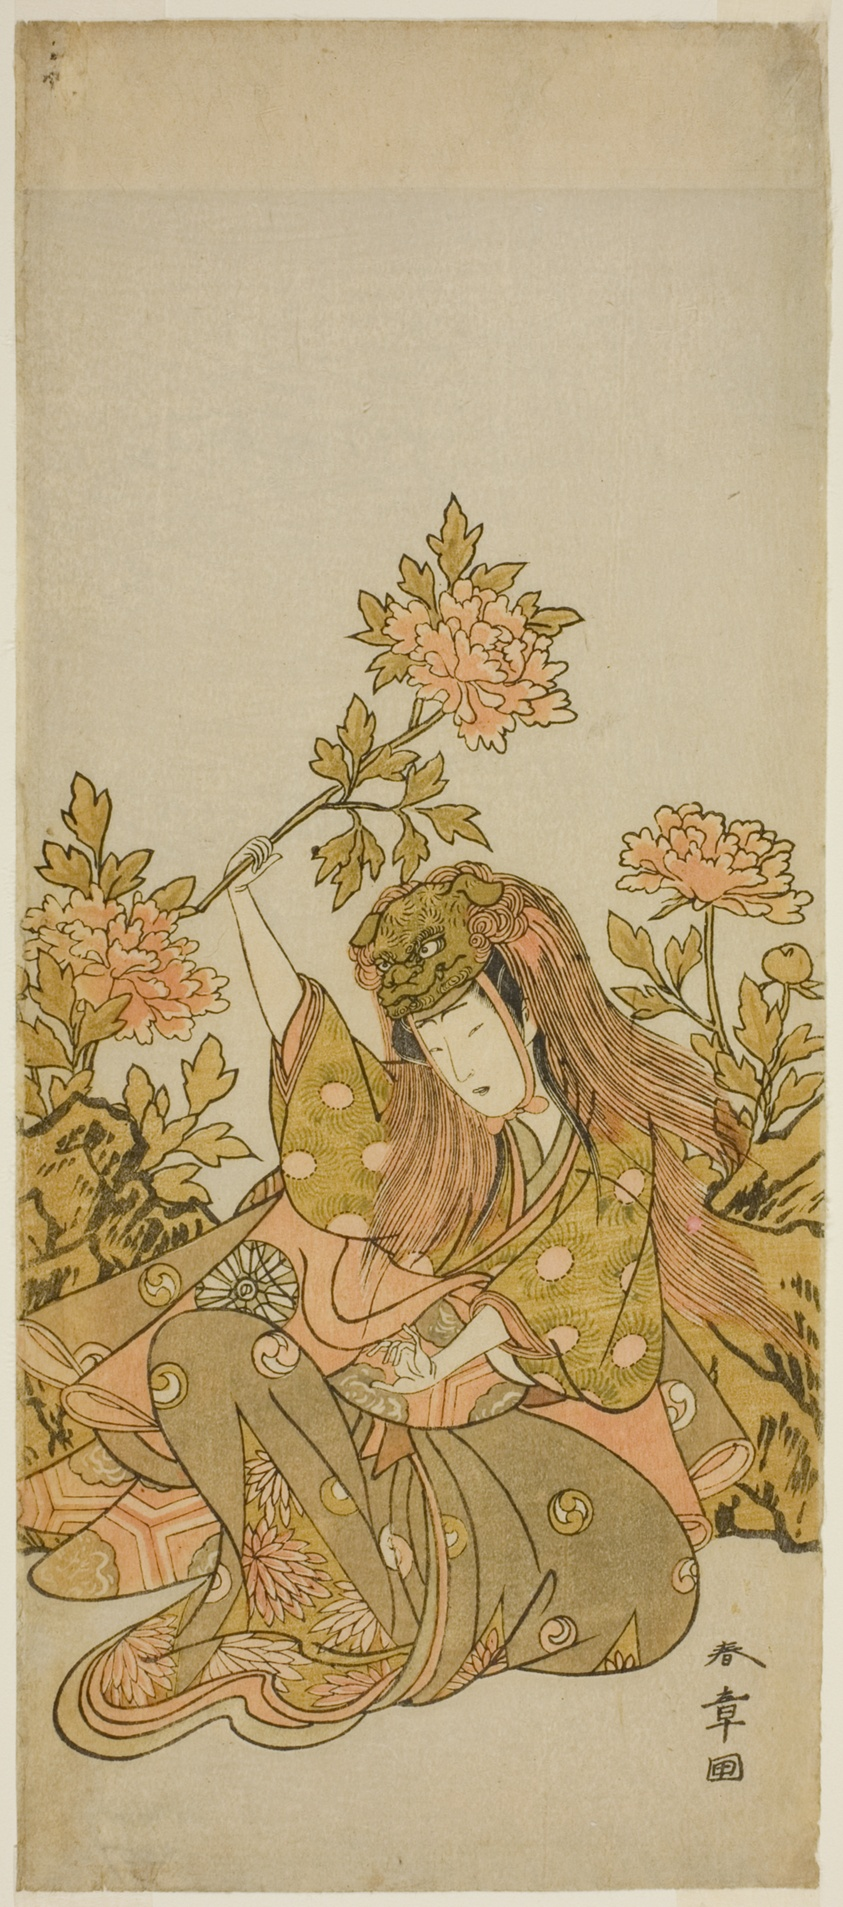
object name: Print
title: The Actor Nakamura Noshio I in a "Shak-kyo Odori" (Stone Bridge Dance), in the Play Onna Aruji Hatsuyuki no Sekai, Performed at the Morita Theater in the Eleventh Month, 1773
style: Japanese (culture or style)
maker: Katsukawa Shunsho 勝川 春章; Japanese, 1726-1792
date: c. 1773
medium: Color woodblock print; hosoban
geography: Japan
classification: woodblock print; print; asian art